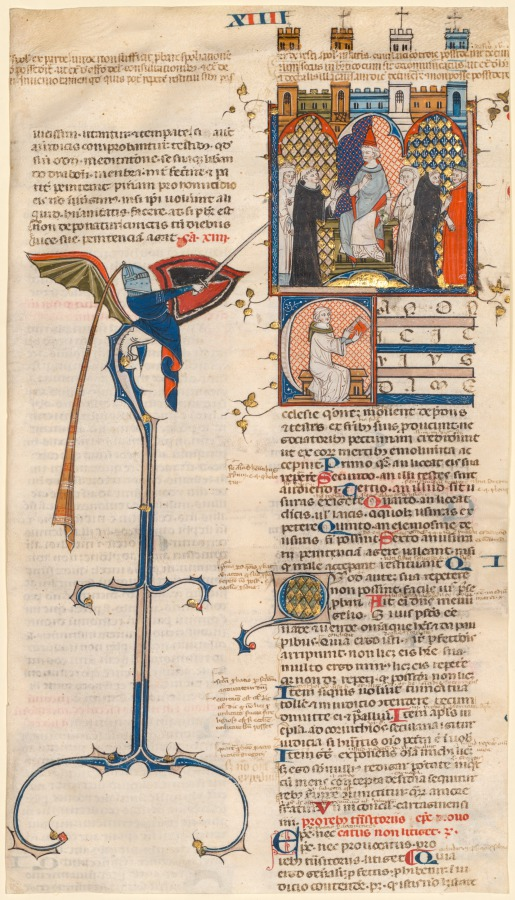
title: Leaf Excised from a "Decretum" by Gratian: Initial C[anonici cuiusdam ecclesiae] with a Seated Cleric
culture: France, Avignon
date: c. 1300–1310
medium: ink, tempera, and gold on vellum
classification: Manuscript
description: Introducing Causa XIV (law case) of the Decretum, this initial C is but one component of a complex decoration scheme. The artist also included a miniature representing an audience scene before a bishop and large drollery (hybrid figure) of a jousting knight beneath the left text column. Both of these devices serve to separate the end of one text and the beginning of another but, in the process, overshadow the initial itself. The script has been identified as by an Italian hand. Because Bologna was the center for the study of canon law at this time, it seems that the codex may have been copied there. The illumination was applied after the undecorated manuscript was carried to France.